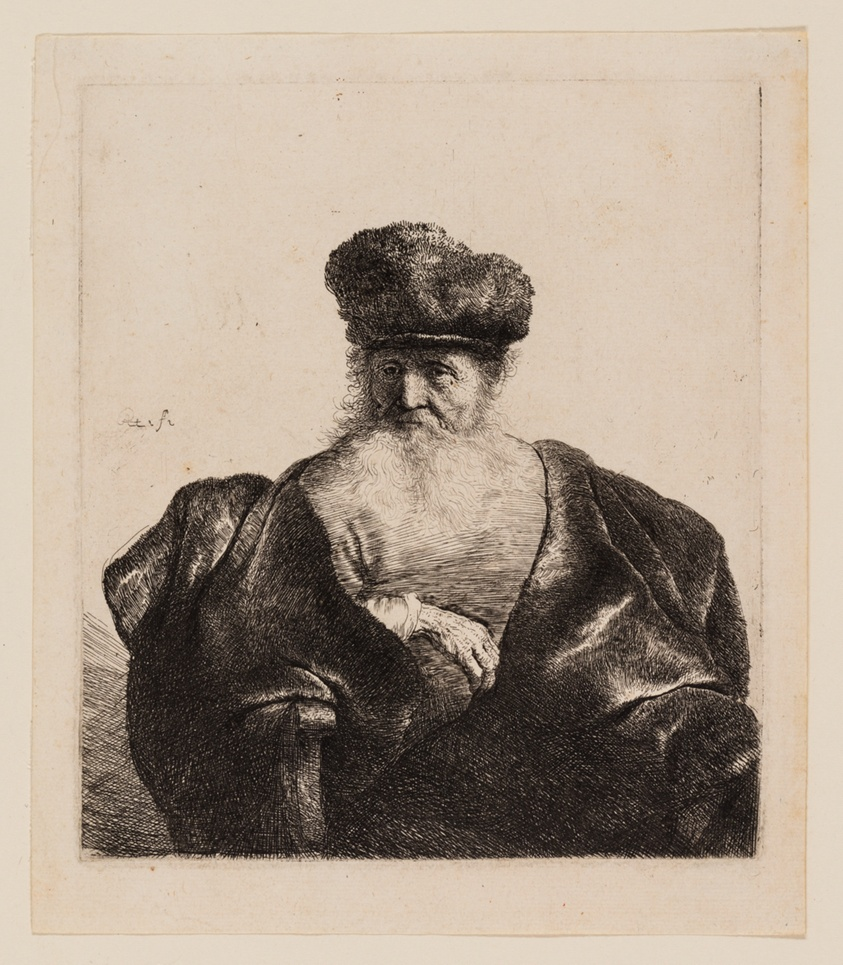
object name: Print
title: Old Man with Beard, Fur Cap, and Velvet Cloak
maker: Rembrandt van Rijn (Dutch, 1606-1669)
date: c. 1631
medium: Etching on paper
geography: Holland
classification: etching; print; prints and drawing; paper